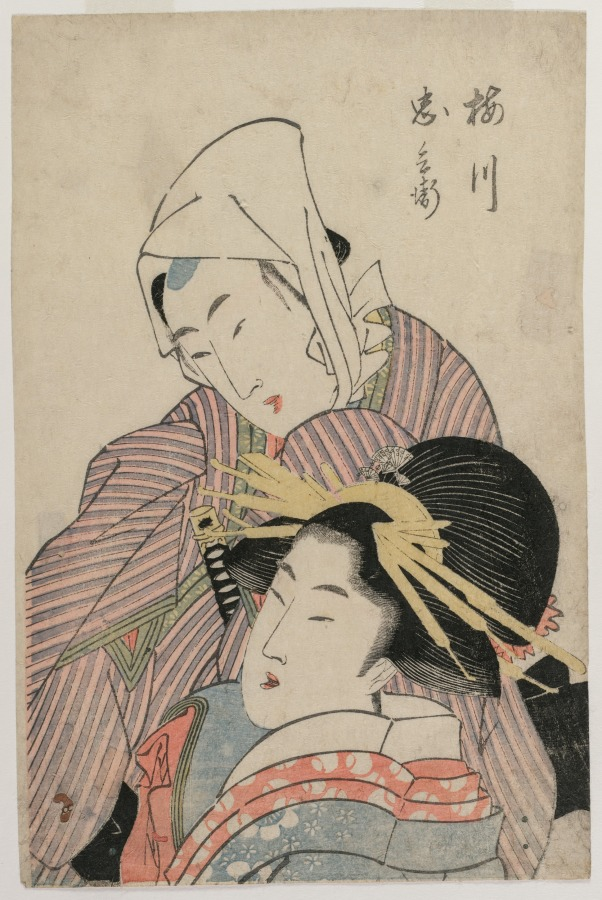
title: The Lovers Umegawa and Chubei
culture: Japan, Edo period (1615–1868)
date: early 1800s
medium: color woodblock print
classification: Print